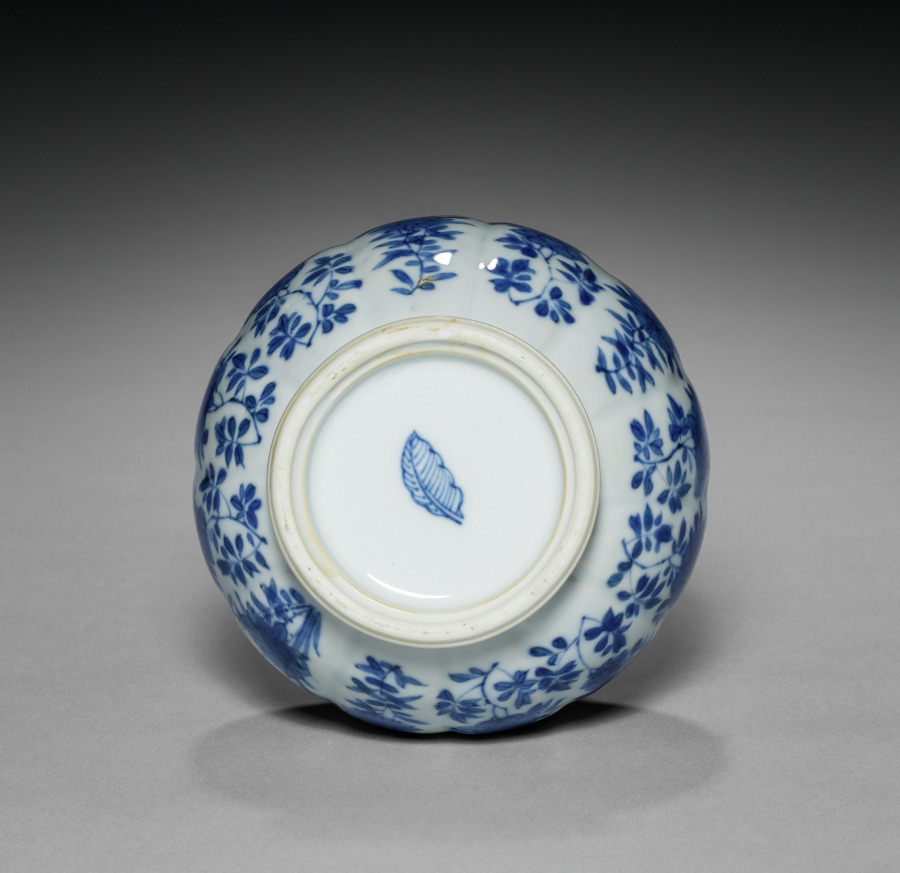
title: Lobed vase with underglaze cobalt blue decoration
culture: China, Jiangxi province, Jingdezhen kilns, Qing dynasty (1644-1911), Kangxi reign (1661-1722)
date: 1661–1722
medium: Porcelain with underglaze cobalt blue decoration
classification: Ceramic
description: Underglaze blue-and-white designs reached their highest painterly quality during the reign of the Kangxi emperor (1662–1722). Porcelain decorators achieved a level of artistic and technical sophistication that rivaled that of professional painters. Blue-and-white porcelains in brilliant cobalt blue catered to the taste of the educated class, the court, and foreign markets. Notice the blue-and-white porcelains in Pierre Bonnard’s painting Fruit and Fruit Dishes (CMA 2020.100); such ceramics on a French dining table would have been inspired by Chinese porcelains of this type.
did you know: The underside shows the mark of a feather, done in blue underglaze.